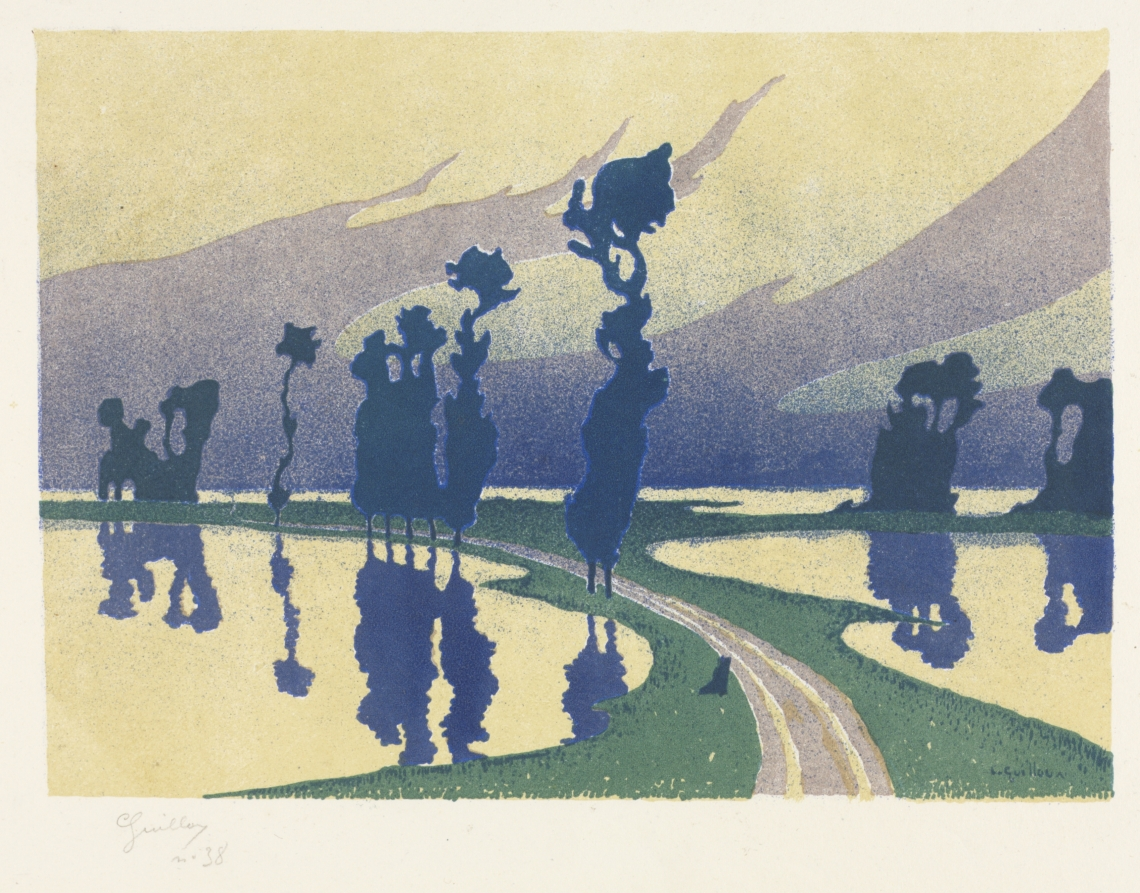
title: The Deluge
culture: France, 19th century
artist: Charles Guilloux (French, 1866–1946)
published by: L'Estampe Originale (blindstamp lower right)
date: 1893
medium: color lithograph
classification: Print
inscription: lower left in graphite: Guilloux no 38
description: Guilloux’s The Deluge appeared in the famous L’Estampe Originale, a series of nine albums of original prints published in Paris between 1893 and 1895, representing the pinnacle of fin-de-siècle printmaking. The albums included numerous landscapes by masters of the genre, including Camille Pissarro, Charles Dulac, Henri Rivière, and Joseph Pennell (all in this exhibition). In The Deluge, drenched poplar trees are reflected in shimmering pools of water. Guilloux incorporated the aesthetic of Art Nouveau into his entirely original, stylized landscapes.